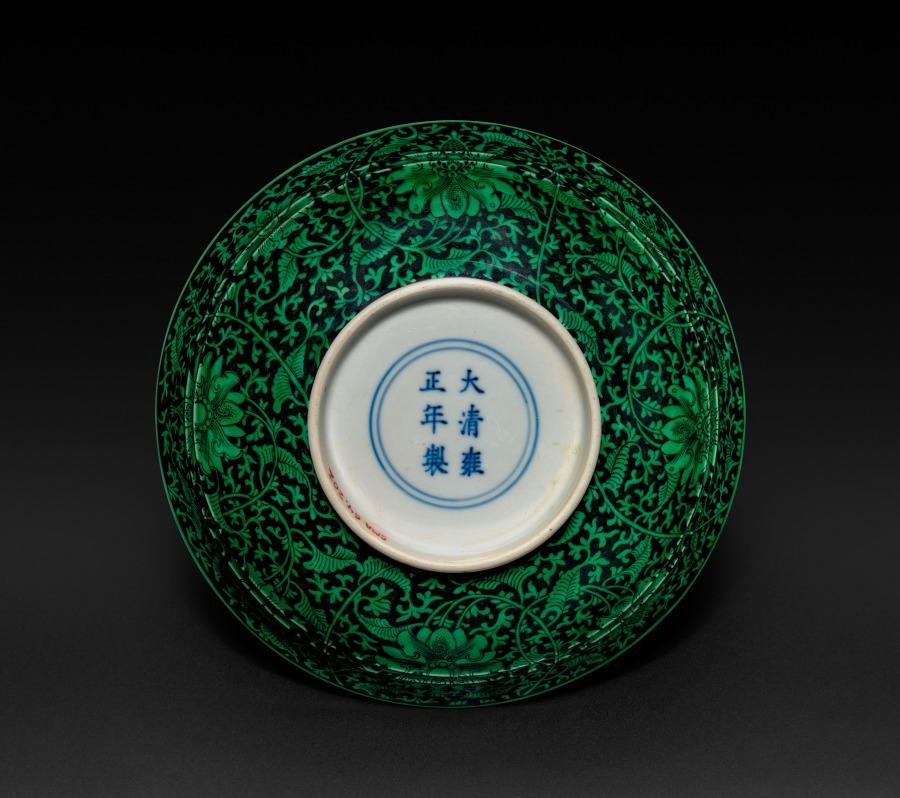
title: Dish with Narcissus and Rocks (interior); Floral Scrolls (exterior)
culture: China, Jiangxi province, Jingdezhen kilns, Qing dynasty (1644-1911), Yongzheng mark and reign (1722-35)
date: 1723–35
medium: Porcelain painted in overglaze-black with a green glaze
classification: Ceramic